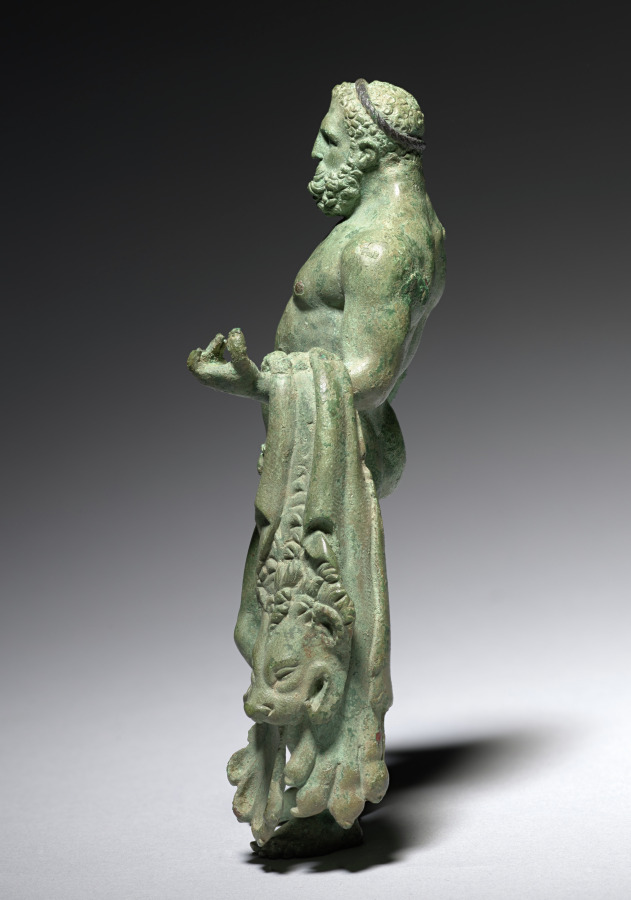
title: Hercules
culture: Italy, Rome, Early Imperial period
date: c. 30 BCE–20 CE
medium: bronze with silver and copper inlays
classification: Sculpture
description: This bronze statuette is a nude figure of the hero Hercules. He stands in a contrapposto pose, with the majority of his weight on one leg. Over his left arm, Hercules holds the skin of the Nemean Lion, having slayed the beast as part of his Twelve Labors and now carrying the pelt as a trophy. Although now mostly lost, Hercules once held his signature wooden club in his right hand. Roman artists often portrayed Hercules as middle-aged, as though greater maturity would increase his power and virility.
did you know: Hercules is the Roman name for the classical hero known in Greek as Herakles.